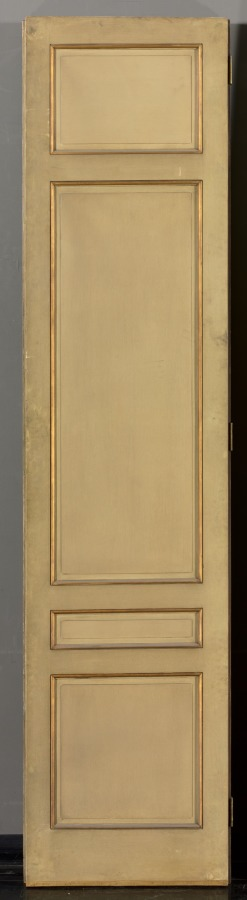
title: Double-leaf Doors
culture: France, 18th century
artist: Pierre Rousseau (French, 1751–1829)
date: 1790s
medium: oil on wood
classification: Painting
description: Shifts in style and taste often result in changes to original architectural details. Rousseau painted these doors with imitation dark wood grain. Another craftsman later scraped off the dark color surrounding the classical designs.